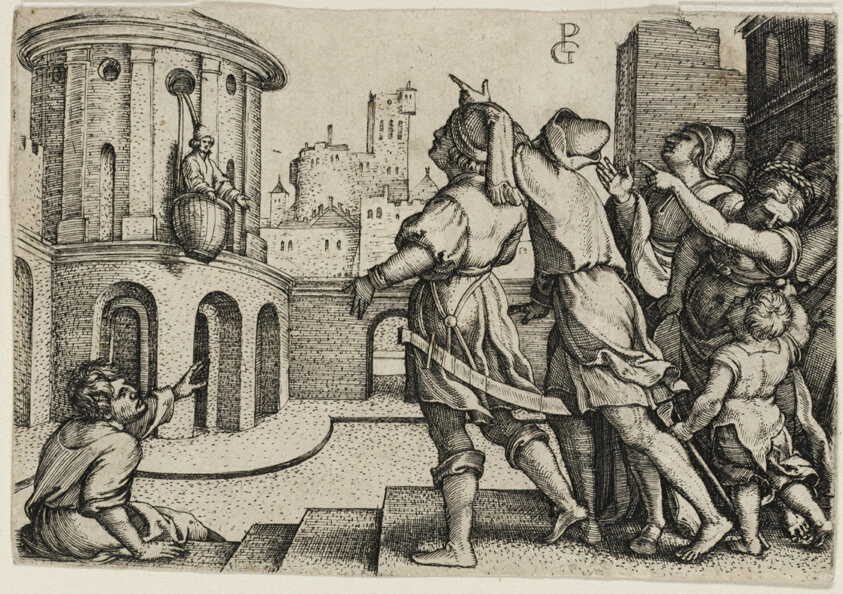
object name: Print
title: Virgil Suspended in a Basket, copy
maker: After Georg Pencz; German, c. 1500-1550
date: 1541/1600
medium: Engraving in black on ivory laid paper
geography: Germany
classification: engraving; print; prints and drawing